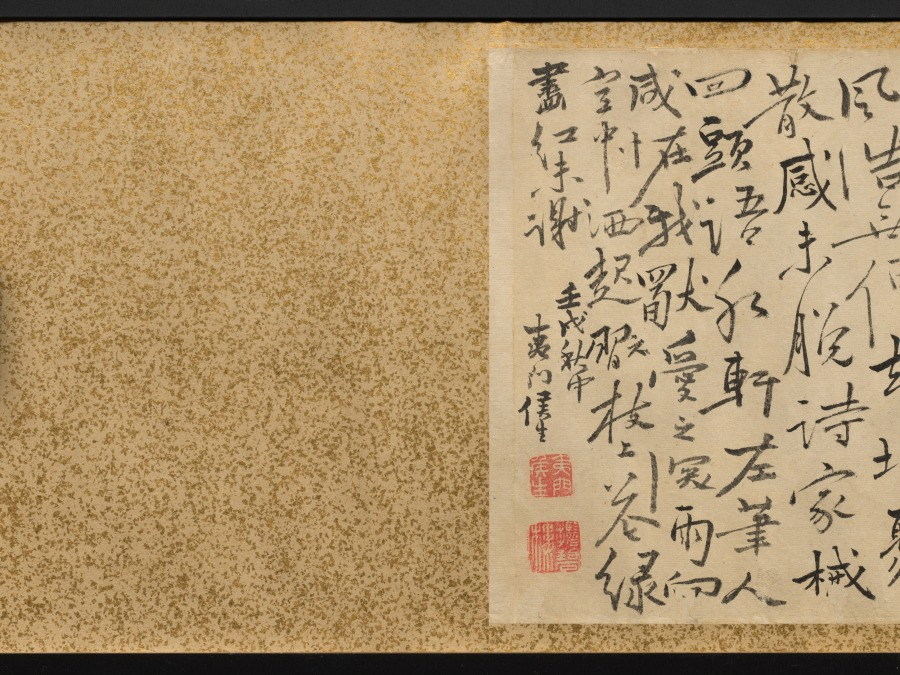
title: Plum Blossoms and Peonies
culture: China, Qing dynasty (1644-1911)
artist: Gao Fenghan (Chinese, 1683–1749)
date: 1741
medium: handscroll, ink on paper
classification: Painting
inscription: Artist's 2 inscriptions and 9 seals (the painting of Peonies with the artist's colophon and the colophon by Hou Chia-fan are on a single sheet of paper). Artist's inscription and 2 seals (Plum Blossoms): [seal] Ts'ai-yün. After finishing writing my colophon, I unrolled the painting to take another look, and it now seems that the composition here should have moved to the later part of the scroll. If that is the case, then the "Cool Beauty" [prunus] of the Solitary Hill is after all unable to take precedence over the "King of Flowers" [peony]. A laugh. Lao-fou inscribed. [seal] Feng-han. Artist's colophon (Plum Blossoms): [3 seals] Tun; Yen-yün-kung-yang, Hou-shang-tso-sheng. A few days after I painted this scroll for Shui- hsien [Yüeh Meng-yüan], the plum blossoms were in full bloom at his residence. He invited me over to enjoy them together for a long while, and I composed two additional poems and wrote them down here for his criticism. [Poems on the colophon are not translated.] First month, twenty-first day, your junior, Kao Feng-han of Nan-fou drafted this with the left hand. [seal] Feng-han. Artist's inscription and 4 seals (Peonies): Brushed with the left hand in the hsin-yu year [1741]. [seal] Yu-hsi. [3 seals at end of painting] Hou-shang-tso-sheng; Yen-yün-kung-yang; Shih-tsao-wu. Artist's colophon and seal (Peonies): The imperial concubine from the Yang family loved to dress in red, And from the emperor won the title of Hai-t'ang. But ever since she became the new dream of the moon palace, She changed into rainbow colors, while learning to dance. After I wrote the poem on Looking for Plum Blossoms in the Teng-wei Mountains, I attached to it a few branches of prunus, some bamboo tips and a piece of rock, with a scattering of green [moss] here and there to fill up the scroll. Unexpectedly, my playful fascination [with these subjects] was still not quite satisfied, so I made up these amorous ideas and romantic images [of the peony], to follow the footsteps of the fair lady of the Ku-hsieh Mountain [prunus]. Furthermore, I picked out one poem to be my vanguard. Perhaps such luminosity of wealth and power will be enough to overwhelm the poor fellows, and [they] will not mind the comparatively short length [of paper] assigned to it. Amusingly inscribed. Please correct me again. To Shui-hsien, my learned senior, your junior Han inscribed again. [seal] Tso-hua [left-handed painting]. 1 additional colophon and 5 additional seals: 1 colophon, dated 1742, and 3 seals of Hou Chia-fan (act. ca. 1742); 1 seal of P'u Ch'üan (20th c.?); 1 seal of Li family (dates unknown).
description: One of the so-called Yangzhou Eccentrics (a group of painters who lived in Yangzhou and were known for their unorthodox art and lifestyle), Gao Fenghan depicts China’s two most loved flowers in full bloom—the “cold beauty,” or plum blossom, in the first section, and the “king of flowers,” or peony, in the second section. Painted in 1741, the year when Gao decided to leave the south and return home to Shandong province in eastern China, this work was likely a token of farewell. His casual brushwork may indicate his mental and physical struggle at the time. After having crippled his right hand in 1737, Gao used his left hand to paint and achieved a crudeness and eccentric style unattainable before.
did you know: In East Asian art, peonies traditionally symbolize prosperity and wealth.